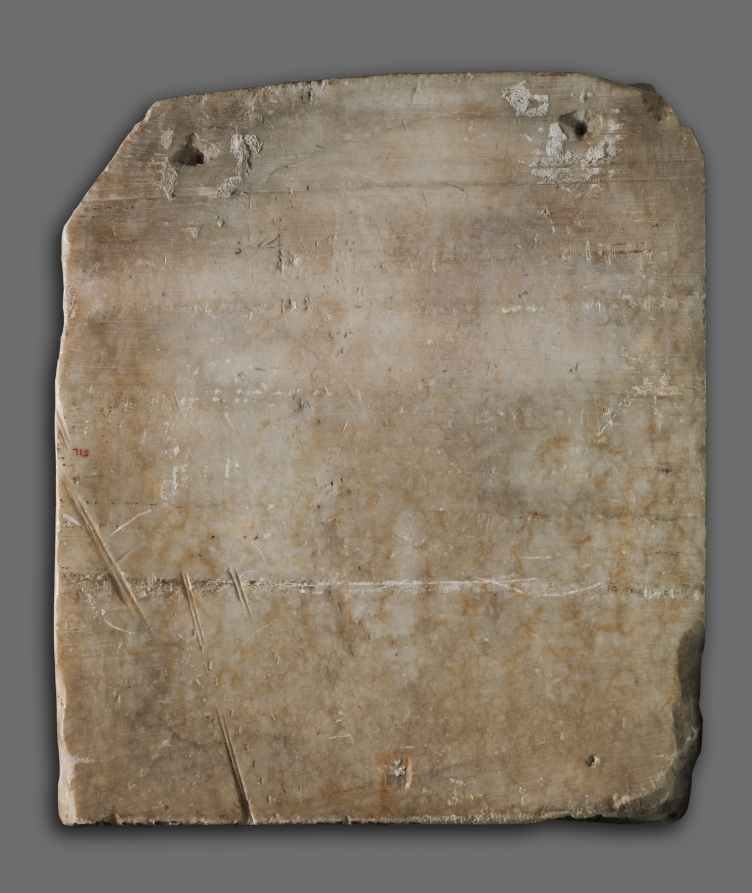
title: Christ Carrying the Cross with Saints Simon and Veronica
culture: South Netherlands, Hainault, 16th century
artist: workshop of Jacques Dubroeucq (Netherlandish, 1500/10–1584)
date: c. 1545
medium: alabaster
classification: Sculpture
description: As Christ dragged his cross through the streets of Jerusalem, Veronica wiped sweat from Christ’s face, which was miraculously imprinted on the fabric. This relief probably came from a choir screen, a barrier between the altar and the congregation, common in medieval churches. Yet the sculpture is more classical than medieval. The artist, yet to be identified, clearly knew the work of Dubreoucq, an artist who brought a taste for Italian Renaissance sculpture to northern France and present-day Belgium. The use of alabaster instead of marble exploits a material local to this part of Europe.